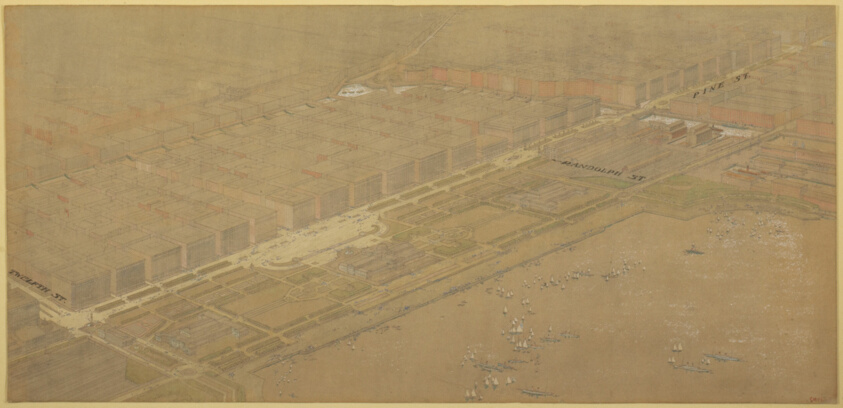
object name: Architectural Drawing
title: Plate 114 from The Plan of Chicago, 1909: Chicago. Proposed Boulevard and Parkway on Michigan Avenue and Pine Street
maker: Daniel Hudson Burnham, American, 1846-1912; Edward Herbert Bennett, American, born England, 1874-1954; Chris U. Bagge, delineator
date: 1909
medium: Graphite, watercolor, and chalk on paper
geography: Chicago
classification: graphite; architectural drawing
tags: Chicago, architecture